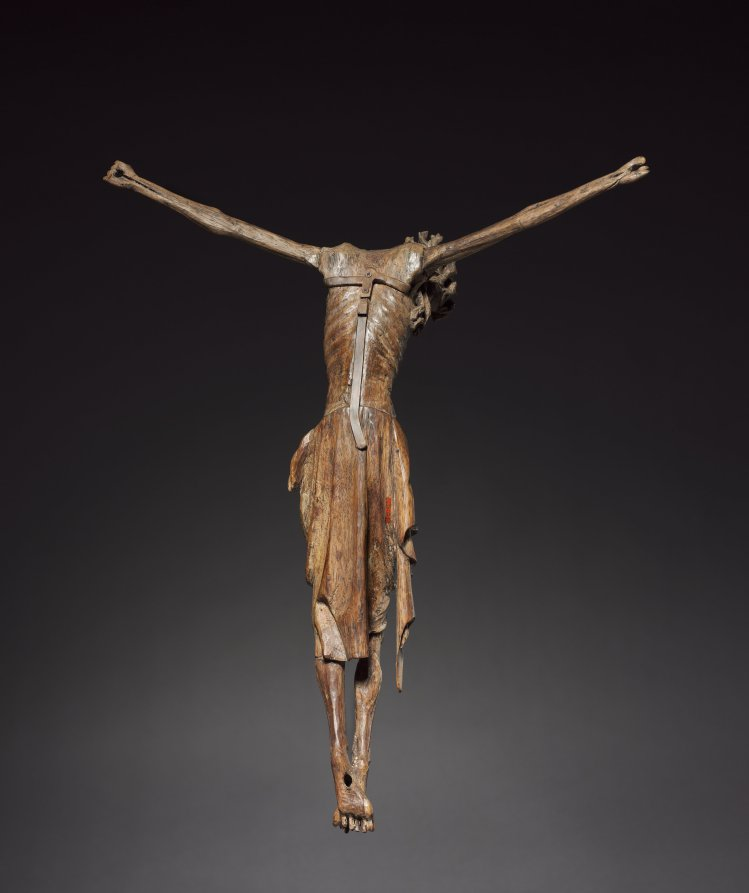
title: Crucified Christ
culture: Germany, Cologne, 14th century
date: c. 1340–1350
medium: wood (walnut) once polychromed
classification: Sculpture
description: The striking impression of this figure is the vivid representation of suffering. The sculpture captures the moment after Christ’s death: the drooping head on a frail neck is a mask of agony. The eyes are nearly shut, the mouth is ajar, and the forehead crowned by heavy, gouging thorns is drawn with pain. The elongation of the body is emphasized by the emaciated chest with protruding ribs and bony limbs. The resulting sense of frailty and pathos is augmented by the heavy strands of hair that uncurl alongside the tormented face and by the loincloth folds that break the downward drape of the body. The sculpture belongs to a group of emotional crucifixes and pietas carved in the Middle-Rhine region for over a century beginning around 1300, examples of which are principally found in the city of Cologne. Such sculptures appealed to the Rhenish mystics, who advocated meditation based on the Passion of Christ.